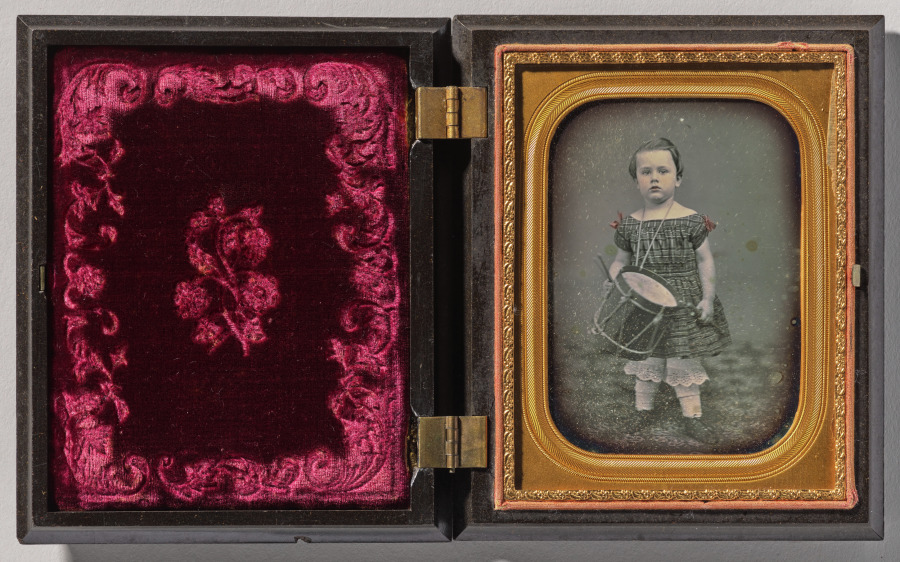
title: Child with Drum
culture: America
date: 1850s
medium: daguerreotype, quarter-plate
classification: Photograph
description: For this finely toned daguerreotype, an unknown photographer skillfully manipulated a bulky camera into a low vantagepoint, ensured even lighting, and positioned the quaintly dressed subject against a neutral background to create a charming portrait. The child was carefully coached to stare directly into the lens and to hold the toy drum and drumsticks convincingly. Perhaps the drum is meant to recall earlier times in American history and to symbolize its fight for independence.